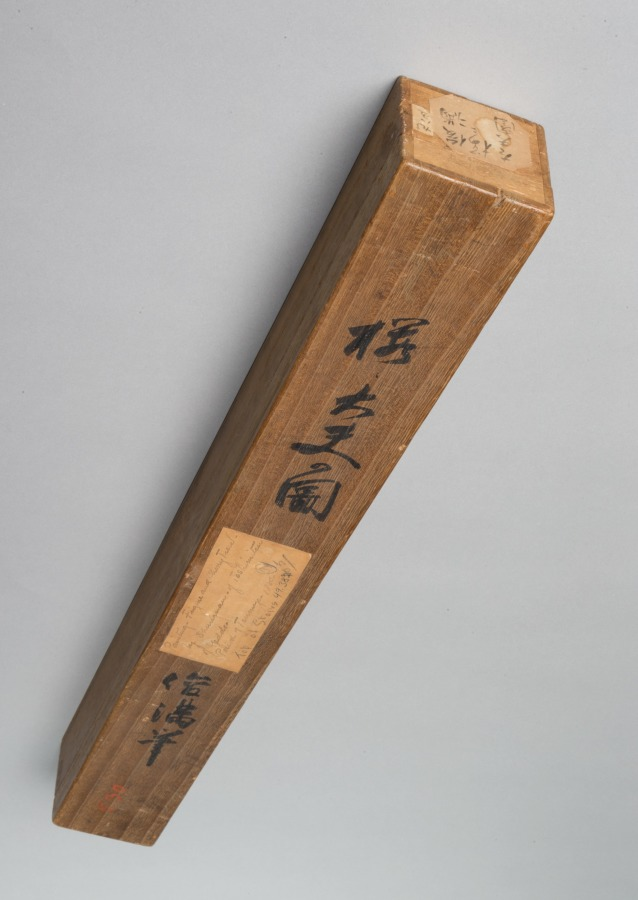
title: Woman and Two Children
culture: Japan, Meiji period (1868–1912)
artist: copy after Kubo Shunman (Japanese, 1757–1820)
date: early 1900s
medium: hanging scroll; color and gold on silk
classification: Painting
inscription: signed Kubo Shunman